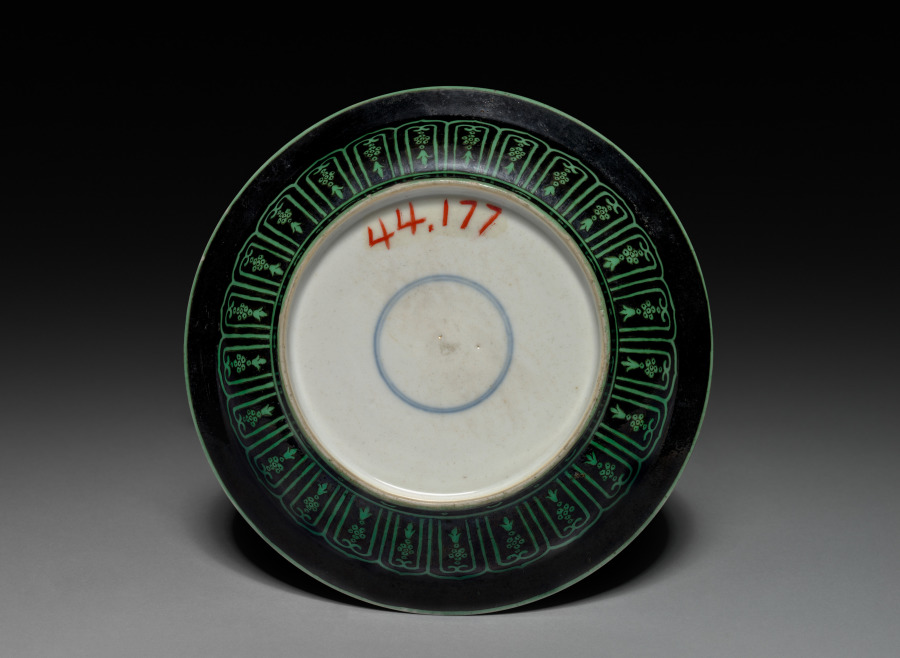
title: Dish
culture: China, Qing dynasty (1644–1911), Qianlong reign (1736–95)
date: 1736–95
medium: porcelain with famille rose overglaze enamel decoration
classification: Ceramic